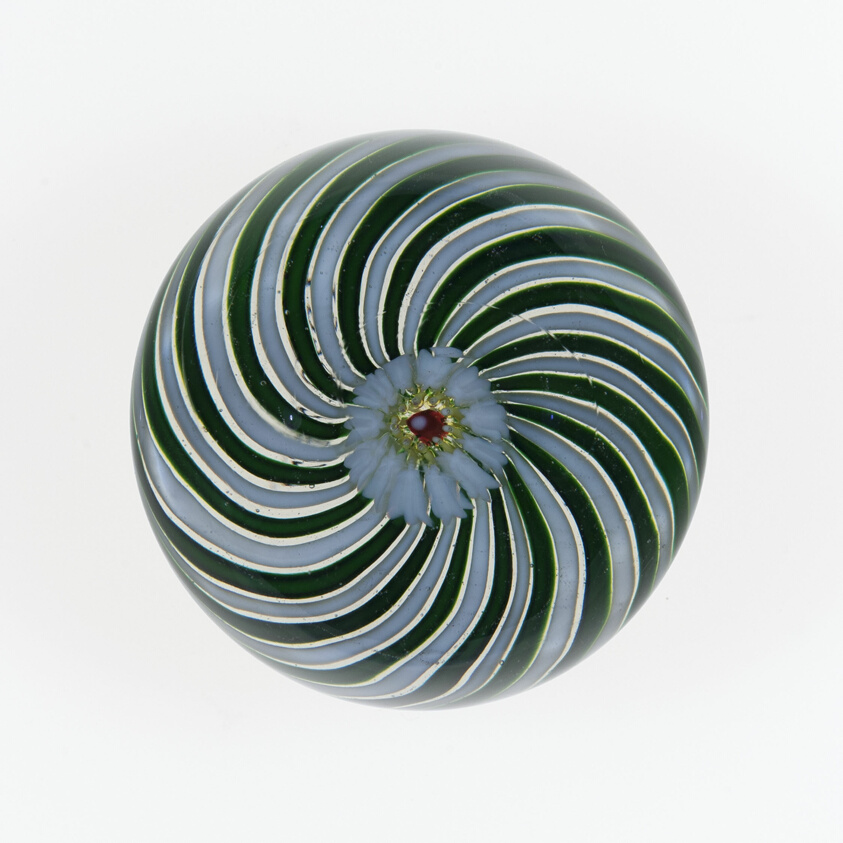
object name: Glass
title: Paperweight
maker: Clichy Glassworks (Cristalleries de Clichy); Clichy, France, 1837-1885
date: c. 1845–55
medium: Glass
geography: Clichy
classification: paperweight; lampwork; european decorative arts; glass